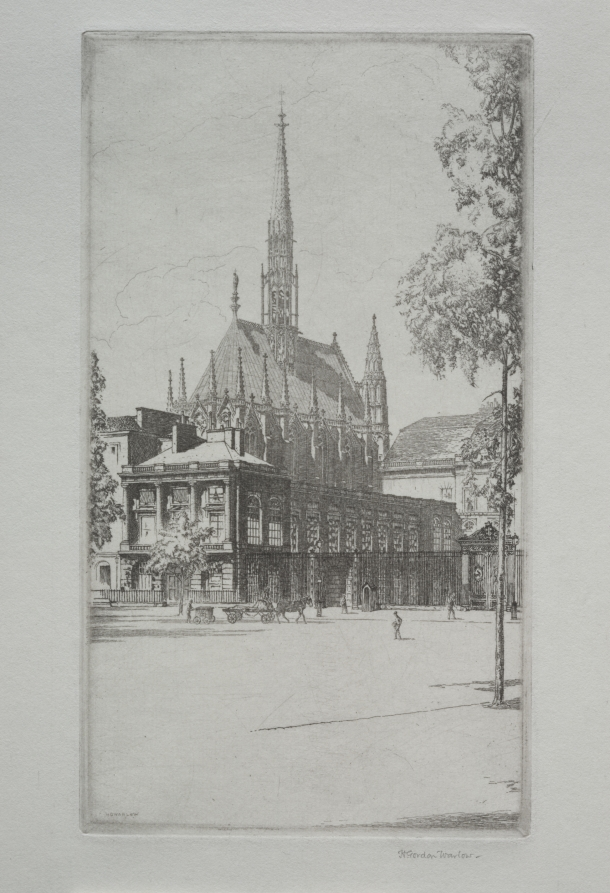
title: St. Chapelle, Paris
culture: England, 20th century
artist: Herbert Gordon Warlow (British, 1885–1942)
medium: drypoint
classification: Print